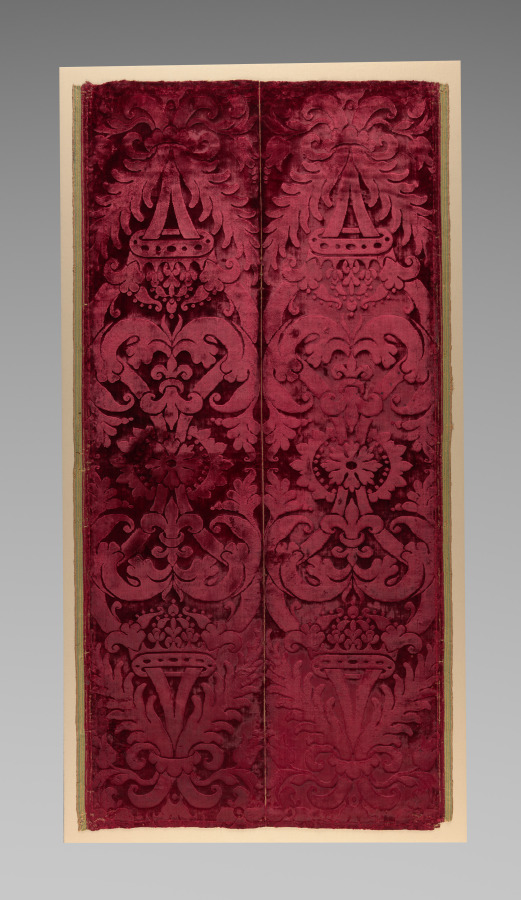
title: Procurator’s Velvet Stole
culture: Italy, Venice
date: c. 1575–1600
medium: Alto e basso silk velvet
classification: Velvet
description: Venetian law obliged senators to wear colored textiles, in contrast to other male citizens, who wore black. The Procurator, a very high level government official, was required to wear a red stole, a cloth worn over one shoulder. So that it would read the same from front and back, the pattern reverses halfway, done by the weaver’s assistant on a drawloom. The line down the center is part of the original manufacture, enabling two stoles to be cut apart for use. The survival of an entire, uncut loom width is extremely rare. The velvet has two different heights of cut pile. The longer pile, which appears lighter, forms the pattern.